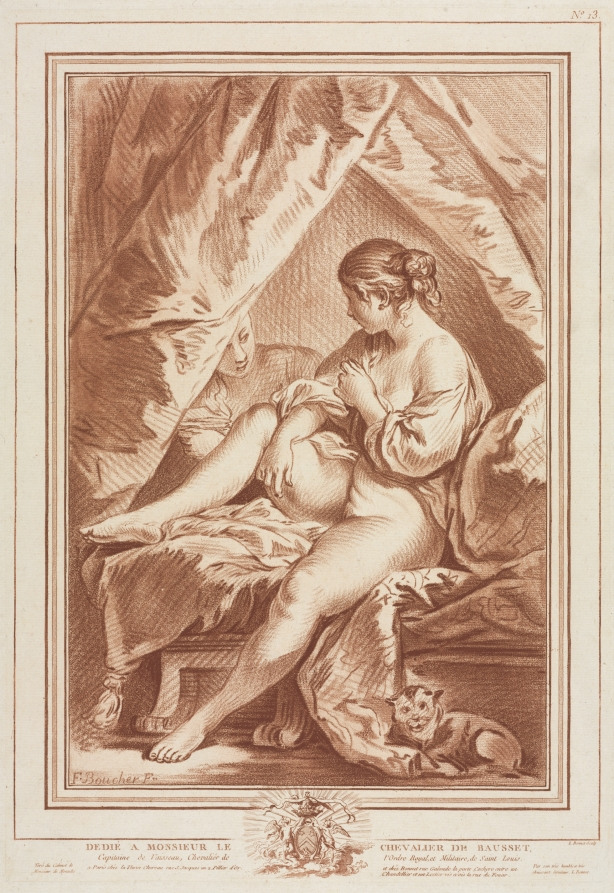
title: Young Woman Seated on a Bed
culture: France, 18th century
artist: Louis-Marin Bonnet (French, 1736–1793)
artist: after François Boucher (French, 1703–1770)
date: before 1764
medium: chalk manner etching and engraving printed in red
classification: Print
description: Although this scene of a nude woman lounging in her bedchamber appears to be drawn with red chalk like the drawings by Greuze and Boucher nearby, it is actually a printed image. Chalk-manner etchings and engravings are made using special punches and rollers with teeth of various sizes set at irregular intervals to re-create the natural granular effects of chalk lines drawn on textured paper.